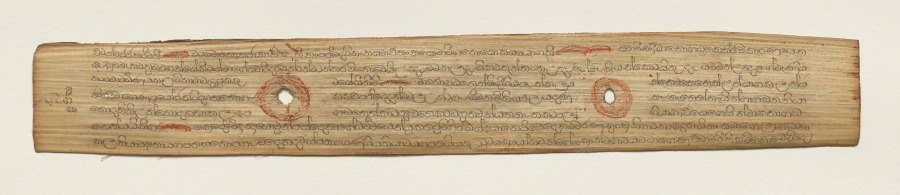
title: Leaf from a Buddhist Manuscript (recto)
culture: Sri Lanka, Singhalese, Late 17th century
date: c. 1700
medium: fiber paper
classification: Manuscript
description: Palm leaf material is still used for manuscripts in Sri Lanka. The palm leaves are prepared first by boiling them, drying them in the sun, and then rubbing them with oils. Scribes then use a metal stylus to incise the text. Then charcoal powder is wiped across the pages, filling in only the inscribed lines.